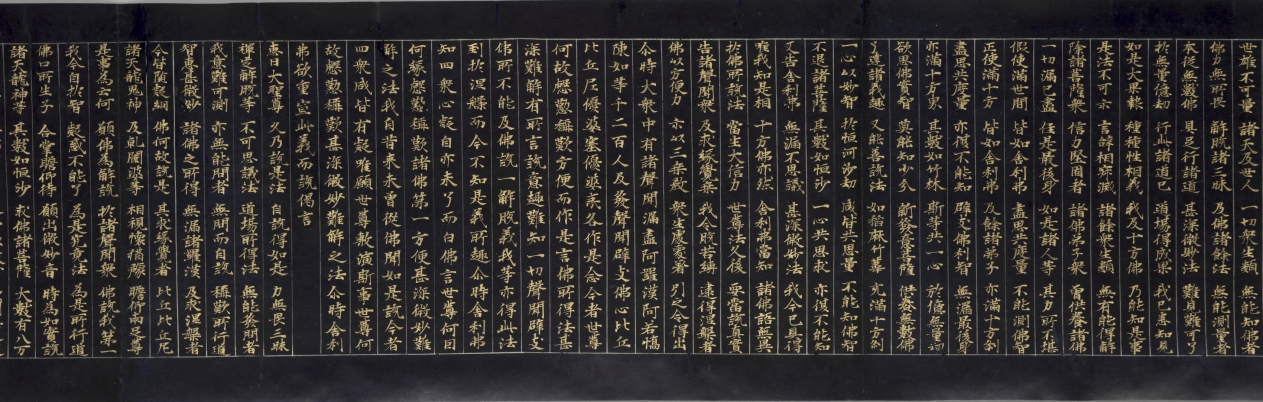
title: Lotus Sutra with a Frontispiece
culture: China, Song dynasty (960–1279)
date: late 1100s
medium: handscroll; gold ink on indigo sutra paper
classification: Painting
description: The frontispiece of this sutra, a sacred Buddhist scripture, illustrates episodes mentioned in the Buddha’s teaching. The sutra begins with a description of the historic Buddha Shakyamuni’s assembly on Vulture Peak. On the right, the Buddha sits amid members of his congregation: lohans (or arhats), bodhisattvas, gods, and other beings. The narrative proceeds from right to left. Heavenly light emanates from Shakyamuni’s brow to “illuminate the eighteen thousand worlds to the east.” Illustrated immediately below the ray is the sutra’s promise that if anyone carves or paints images of the Buddha “they will achieve the Buddha path.” The female figures in the frontispiece point to another promise made in this popular Mahayana school sutra, namely that female devotees and nuns who read the sutra are promised Buddhahood and salvation.